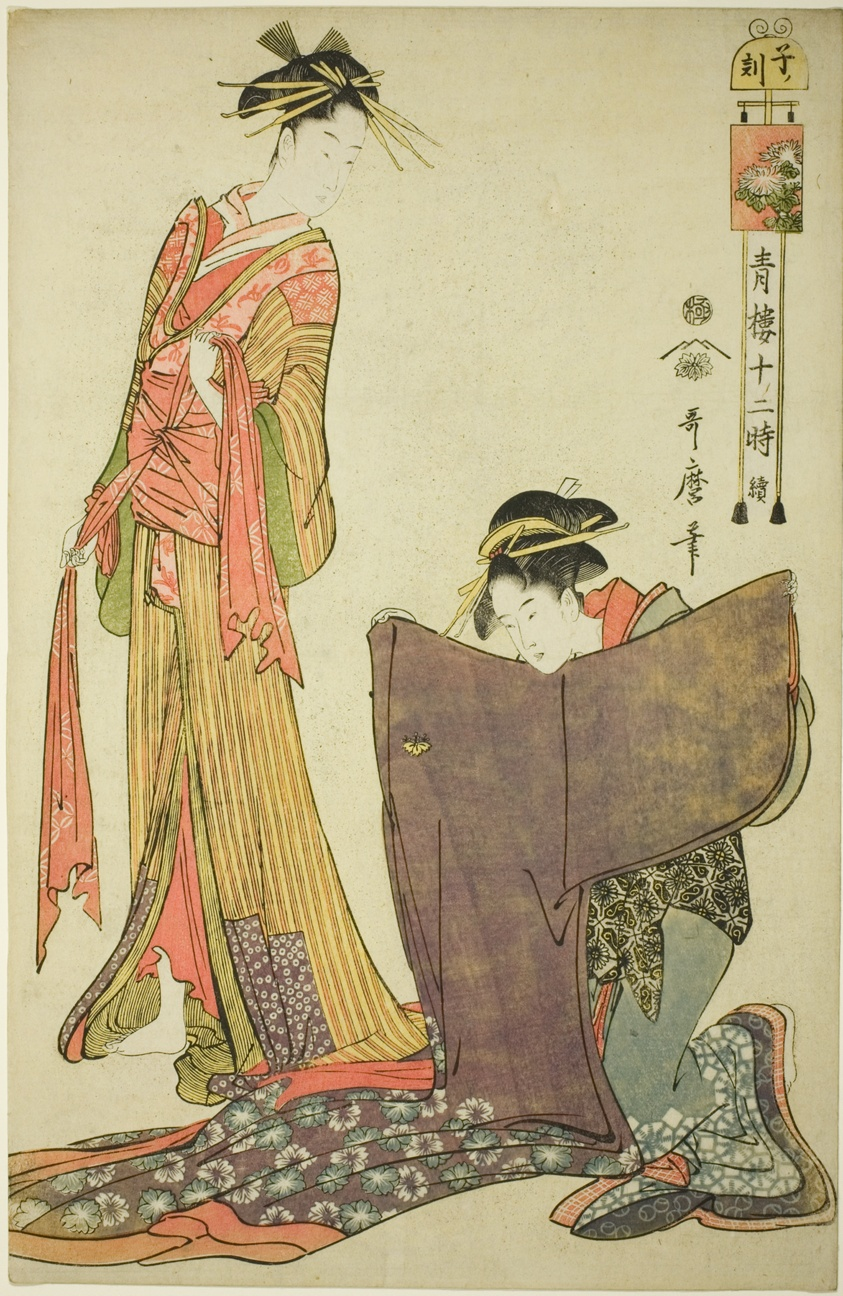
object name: Print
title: Hour of the Rat [12pm] (Ne no koku), from the series "The Twelve Hours in Yoshiwara (Seiro juni toki tsuzuki)"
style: Japanese (culture or style)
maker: Kitagawa Utamaro 喜多川 歌麿; Japanese, 1753 (?)-1806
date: c. 1794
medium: Color woodblock print; oban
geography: Japan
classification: woodblock print; print; asian art